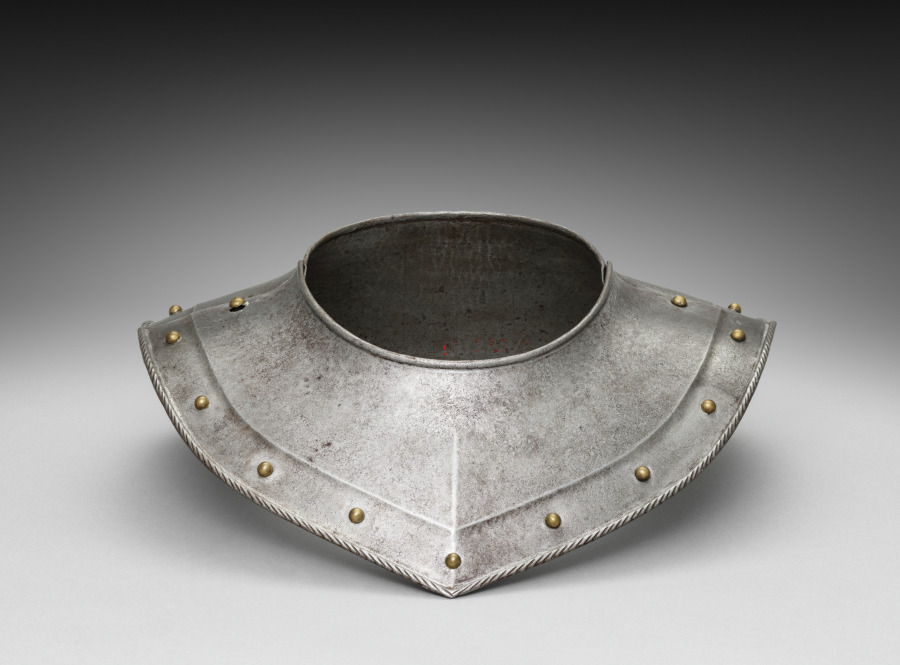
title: Colletin (two pieces)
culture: Germany, 19th century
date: 1801–1900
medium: steel with black paint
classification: Arms and Armor